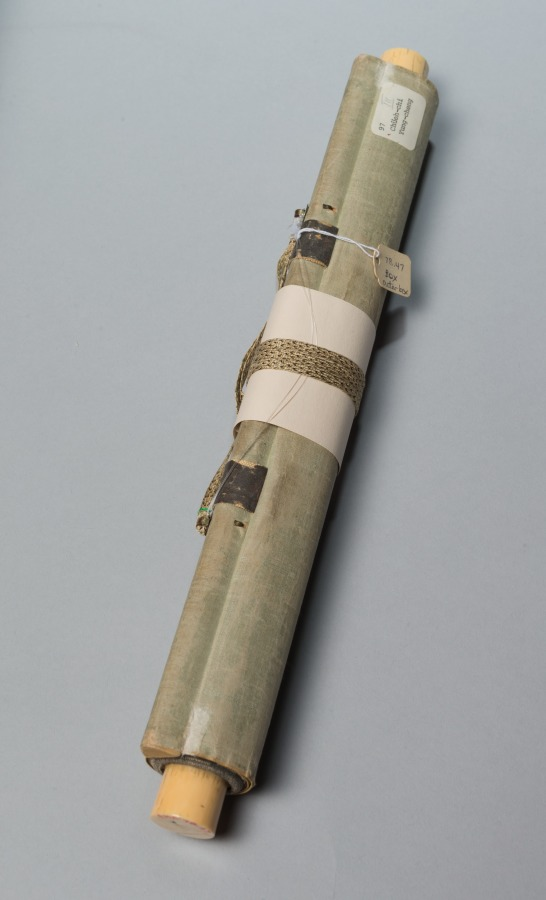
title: White-Robed Guanyin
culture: China, Yuan dynasty (1271-1368)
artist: Jueji Yongzhong (Chinese, active around 1300)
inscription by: Zhongfeng Mingben (Chinese, 1263–1323)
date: late 1200s–early 1300s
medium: hanging scroll; ink on paper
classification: Painting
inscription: Artist's signature: Huanzhu Yongzhong. Inscription by Zhongfeng Mingben: The right thinking [Samkalpa] is embodied within His deep meditation on the Buddha [naga-samadhi]. Retaining not even one single object of thought, A perfect harmony was wonderfully achieved. In the endless time and space, His all-embracing compassion prevails. [signed] Mingben of Huanzhu paying his respects.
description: Guanyin, the bodhisattva of infinite compassion (Avalokiteshvara, in Sanskrit), reveals himself in many forms. According to Buddhist belief, one such manifestation is the white-robed Guanyin sitting on a rock on the island of Putuo (Potalaka, in Sanskrit), located along the coast not far from Ningbo, in Zhejiang Province, China. Here, the figure was swiftly drawn in only a few ink lines. The inscription above is by Zhongfeng Mingben, perhaps the most widely respected and influential Chan (Zen in Japanese) master in the Yuan dynasty. The artist’s signature is a single line below on the left: Huanzhu Yongzhong.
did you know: The CMA collection includes a drawing by a Japanese priest, CMA 1978.47.2, inspired by this composition.